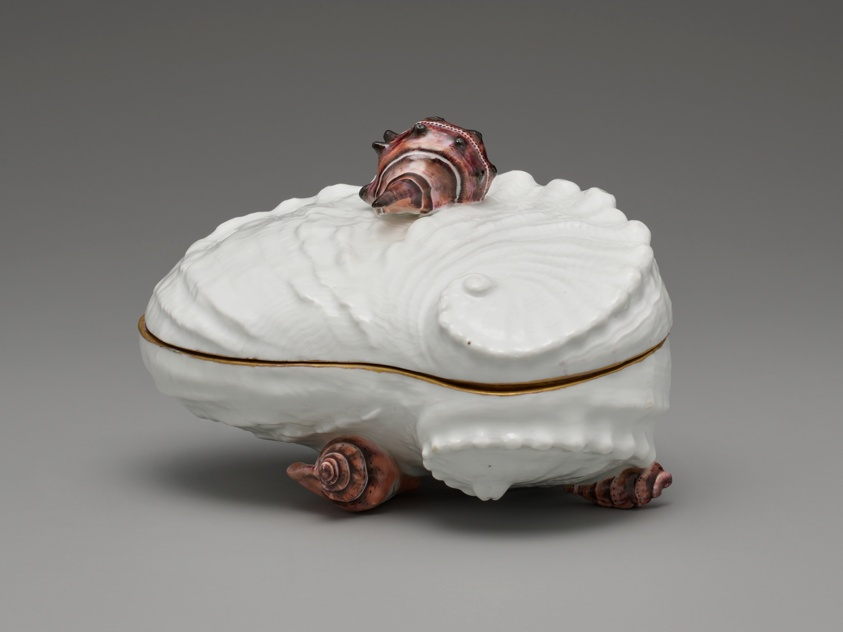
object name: Ceramics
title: Sweetmeat Box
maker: Meissen Porcelain Factory (German, founded 1710); Modeled by J. F. Eberlein (German, 1696-1749)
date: 1746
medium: Hard-paste porcelain, polychrome enamels, and gilt metal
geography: Meissen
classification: porcelain; box; ceramics; enamel; european decorative arts; metal; vessel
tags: shells, seas